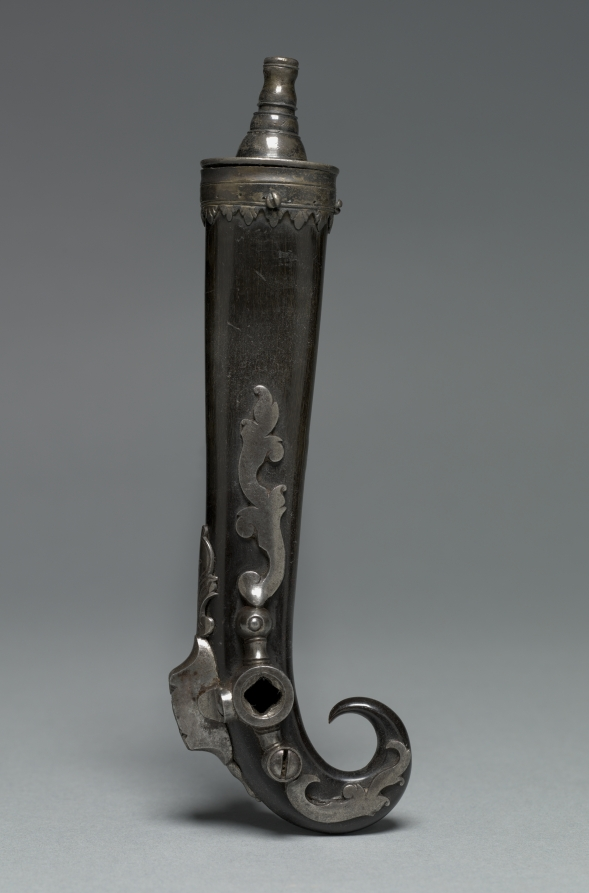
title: Combined Priming Flask and Wheel-Lock Spanner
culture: Germany or Austria, first half of 17th Century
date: c. 1600–1650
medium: horn with brass and steel mounts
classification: Arms and Armor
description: Early firearms required many tools and accessories for their proper use and maintenance. This clever design fulfilled a dual purpose as a spanner and priming flask. Small containers like this one would hold fine-grain gunpowder used to set off (or prime) the main charge in the barrel. A spanner would be used to operate a wheel-lock mechanism that enabled a gun to fire. On the gun, the jaws of the lock clamped a piece of flint or pyrites designed to rub against the rough edge of the wheel projecting into the pan. The wheel was revolved by a tightly coiled spring wound by the spanner and released when the gun's trigger was pulled causing sparks to ignite the gunpowder in the breech.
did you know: Many accessories that were used in hunting were made of the very animals that were to be hunted, this one here was made of horn.